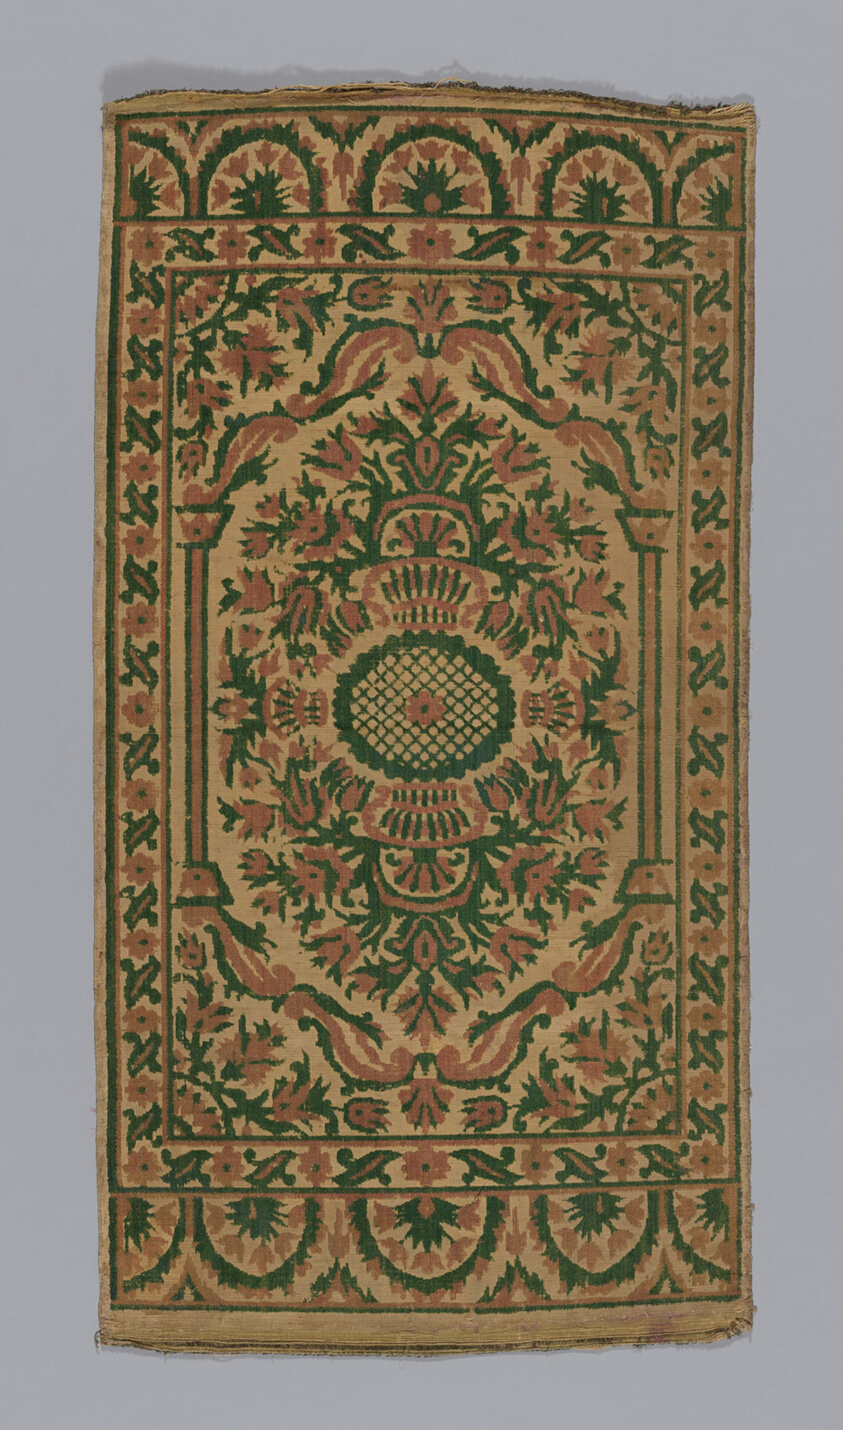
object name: Textile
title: Cushion Cover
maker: Turkey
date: 19th century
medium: Velvet, cut voided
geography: Turkey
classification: textile; weaving